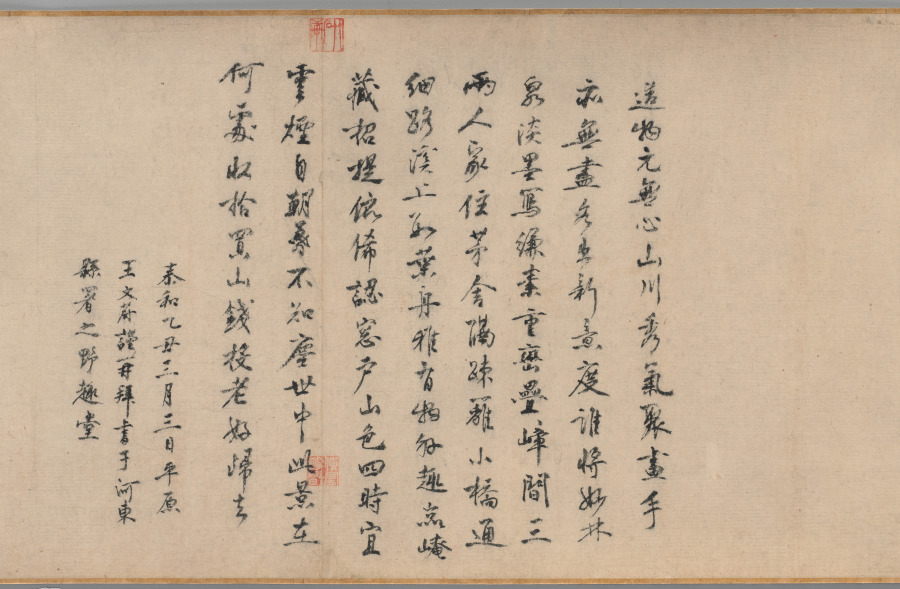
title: Streams and Mountains without End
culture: China, late Northern Song dynasty (960-1127) - Jin dynasty (1115-1234)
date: 1100–1150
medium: handscroll; ink and slight color on silk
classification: Painting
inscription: 9 colophons and 48 seals: 1 colophon, dated 1205, of Wang Wenwei 王文蔚 (dates unknown); 1 colophon, dated 1205, of Li Hui 李惠 (dates unknown); 1 colophon of Weiluo Tian Xie 蔚羅田獬 (dates unknown); 1 colophon, dated 1214, of He Yan 何言 (dates unknown); 1 colophon, dated 1326, of Cao Yuanyong 曹元用 (d. 1329) 1 colophon, dated 1332, of Kangli Zishan 康里子山 (Naonao; 1295-1345); 1 colophon, dated 1336, of Liu Zai 劉載. (dates unknown); 1 colophon, dated 1380, and 4 seals of Yang Mao 楊懋 (1300-after 1380); 4 seals of the Hou family (ca. 1340); 1 colophon of Wang Duo 王鐸 (1592-1652); 4 seals of Zhang Bingqian 張秉乾 (juren of 1729); 8 seals of Liang Qingbiao 梁清標 (1620-1691); 2 seals of the Qianlong emperor (r. 1736-95); 4 seals of the Jiaqing emperor (r. 1796-1820); 3 seals of the Xuantong emperor (r. 1909-11); 2 seals of Ye Gongchuo 葉恭綽 (1881-1968); 17 seals of Zhang Yuan 張爰 (Zhang Daqian 張大千, 1899-1983).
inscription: Colophon 1. Wang Wenwei 王文蔚. Dated third month and third day, 1205, under the reign of Zhangzong of the Jin dynasty. 造物元無心，山川秀氣聚。畫手亦無盡，各出新意度。 誰將妙林泉，淡墨寫縑素。重巒疊嶂間，三兩人家住。 茅舍隔素籬，小橋通細路。溪上數葉舟，雅有物外趣。 嵓崦藏招提，依稀認窗戶。山色四時宜，雲煙自朝暮。 不知塵世中，此景在何處。收拾買山錢，投老好歸去。 泰和乙丑三月三日平原王文蔚謹再拜，書于河東縣署之野趣堂。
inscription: Colophon 2. Li Hui 李惠. The colophon was written three days before the Qingming Festival in 1205. 畫師慣在山中居，含毫吮墨聊自娛。 閑將一段冰霜絹，寫出千里江山圖。 前山後山互出沒，山腰林樾相縈紆。 危橋澗溜瀉鳴玉，山根一匯為平湖。 波平短艇快漁釣，雲深細徑來樵蘇。 僊宮梵宇占幽勝，雕欄複閣森蓬壺。 往來行客煙靄外，飄飄野店青帘孤。 人家雞犬聲相接，熙熙化日安唐宇。 嗟余嗜好何其迂，膏肓泉石真吾徒。 一行作吏墮世網，薄書汨沒勞奔趨。 千巖萬壑但夢想，故園三徑應將蕪。 披圖暫洗黃塵眼，拊膺三嘆空踟躕。 泰和乙丑清明前三日絳臺李惠書于舜城府署之九思堂。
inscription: Colophon 3. Weiluo Tian Xie 蔚羅田獬. 畫工紛紛不可紀，擺脫俗流幾人耳。 夫誰援筆掃鵝溪，一段風煙且千里。 白波青嶂渺無窮，水接山兮山插水。 小橋野店相勾連，古寺樓臺突兀起。 飄然氣象與神俱，但患未明孰姓氏。 郭熙雖老典型存，為問主公無乃是。 此畫世希當寶藏，無與碌碌同一視。 更看卷首數公詩，奇絕清新相表裏。 蔚羅田獬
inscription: Colophon 4. He Yan 何言. Written in 1214. 萬有來自無，一真歸所託。畫師得三昧，胸中幻丘壑。 百態逐墨破，群形隨筆落。地近迹分明，天遙痕隱約。 雲物自吐吞，峯巒非斧鑿。江鄉閴無市，谷關常不鑰。 中有野夫閑，童琴而歩鶴。酒斾出籬懸，漁舟臨岸泊。 澗樹蔽橋樑，巖松迷殿閣。岑疊宿霧重，野曠林煙薄。 危棧接縈紆，亂泉通脈絡。途中人往來，僕馬何羸弱。 怪石虎踡跼，古木龍蟠錯。一幅宜好收，千金非易博。 玉堂閑卷舒，眼界增寥廓。視險尚寛平，見危除慘虐。 氣象溢國華，川澤資廟略。功名業已書，歸去鞭先著。 但知色即空，何是今非昨。飽乎仁智心，箇中無限樂。 貞祐甲戌秋暮，東營何言題。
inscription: Colophon 5. Cao Yuanyong 曹元用 (d. 1329). Dated 1326. 岸擁危橋斷，溪浮小艇斜。 萬山最深處，依約兩三家。 泰定丙寅秋，曹元用題。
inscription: Colophon 6. Kangli Zishan 康里子山 (i.e., Kangli Naonao). The colophon bears a date of 1332. 右溪山圖，意韻蕭灑。一見使人有烟霞之想，真可珍藏。又有□金諸名勝題詩其左。兵火之餘， 殊不易得也。 至順三年暮春之月，康里子山跋。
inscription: Colophon 7. Liu Zai 劉載. 雲拂埜田閑種玉，雨餘巖溜碎傾金。 幾時也結團茆去，麟閤恬然不挂心。 至元二年正月，長安劉載載之謹錄上。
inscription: Colophon 8. Yang Mao 楊懋 (1300–after 1380). 觀此圖，經營位置，筆法高古，山明石潤。其橋梁、路道、樹林、人物、遠近；一一誠得真山水之深趣。非當時名筆有大才者不能至此。不必問其誰何，可為神品。况宋金元三朝名公所跋，尚不能記，想其來尤遠矣。然而物經累變而尚存，是物之有壽者也。余不復再論。文顯其保之。洪武庚申春，八十翁楊懋觀。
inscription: Colophon 9. Wang Duo 王鐸 (1592–1652). 文蓀親翁博雅，文詩鴻暢。舍弟持此喜觀，遂抽管題數語： 山勢委折，筆墨無痕。宋人中如此不多見也。譬之兵家，當是韓白。王鐸。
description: Streams and Mountains without End was a landmark acquisition of 1953, made just a year after Sherman Lee had returned to Cleveland as curator of Oriental art. He acquired it with the intention to provide "a more than adequate foundation for a fine collection of Chinese landscape painting." This impressive work demonstrates the culmination of stylistic developments in Chinese monumental landscape painting following the Northern Song tradition. It represents a journey through a landscape, making it a fitting metaphor for Lee’s journey of discovery and achievement over a lifetime.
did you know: The portrayal of the distant lands is rich with details like pavilions, villages, and human activities.